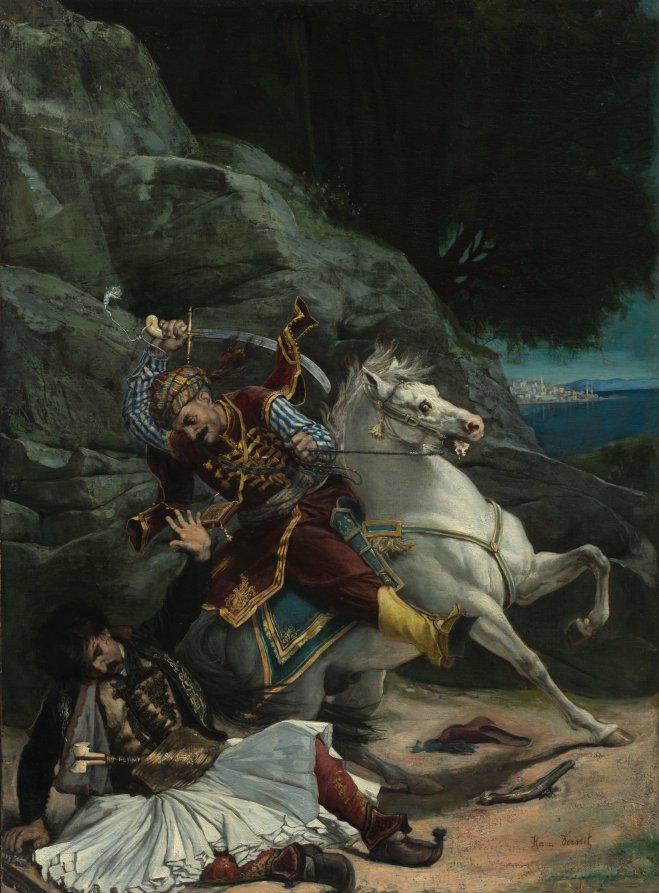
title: Combat of a Greek and a Turk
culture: France, 19th century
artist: imitator of Horace Vernet (French, 1789–1863)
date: after 1835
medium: oil on fabric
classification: Painting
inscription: Signed lower right: Horace Vernet